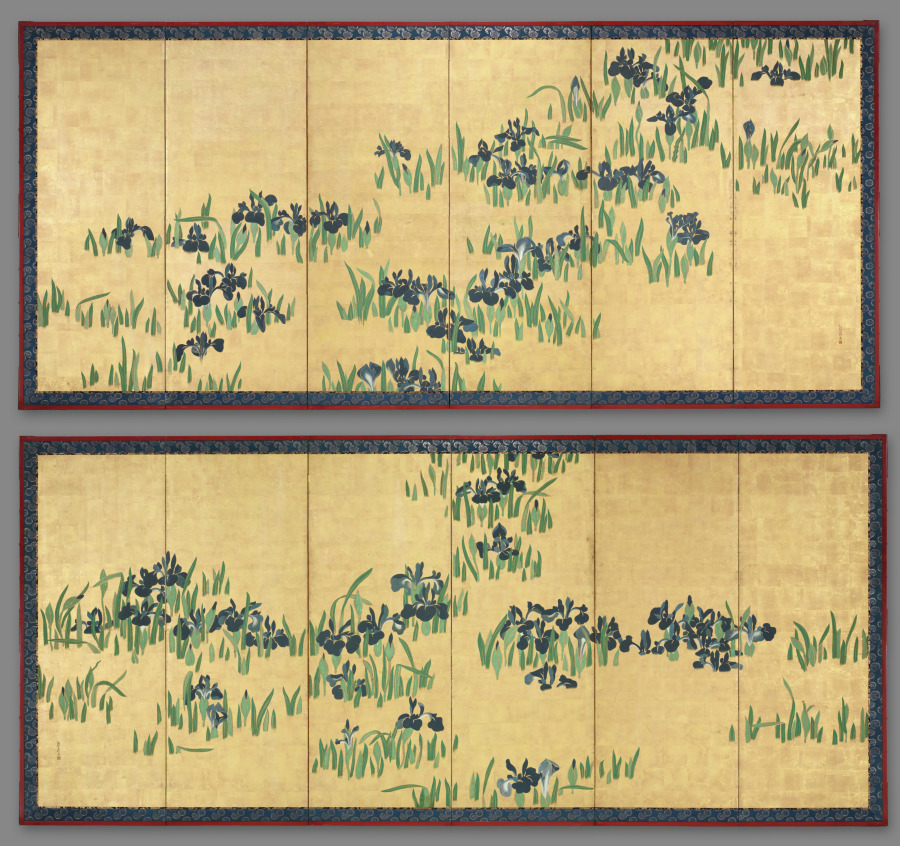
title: Irises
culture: Japan, Edo period (1615–1868)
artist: Watanabe Shikō (Japanese, 1683–1755)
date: 1700s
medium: pair of six-panel folding screens, ink and color on gilded paper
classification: Painting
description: The subject of this painting comes from a 10th-century text. It tells of a young nobleman’s journey into the lonely countryside, far from the capital city of Heian-kyō (Kyoto). There he came upon a small stream, the banks of which were covered with blooming irises, on which the artist has chosen to focus our attention. While viewing the beautiful flowers the nobleman composed a poem: I have a beloved wife, Familiar as the skirt of a well-worn robe, And so this distant journeying Fills my heart with grief.